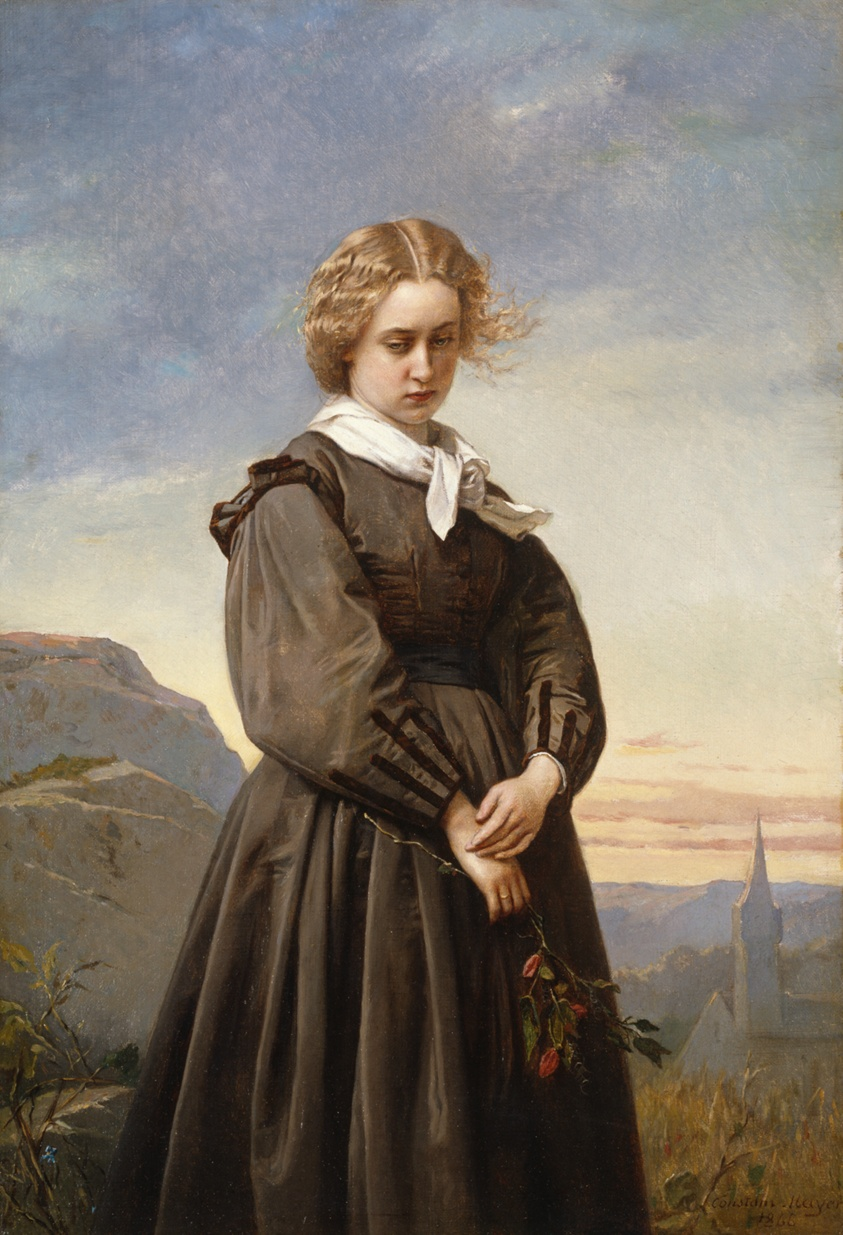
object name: Painting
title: Love's Melancholy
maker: Constant Mayer (American, born France, 1832–1911)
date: 1866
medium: Oil on canvas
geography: United States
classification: painting; american arts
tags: fashion, people, portraits